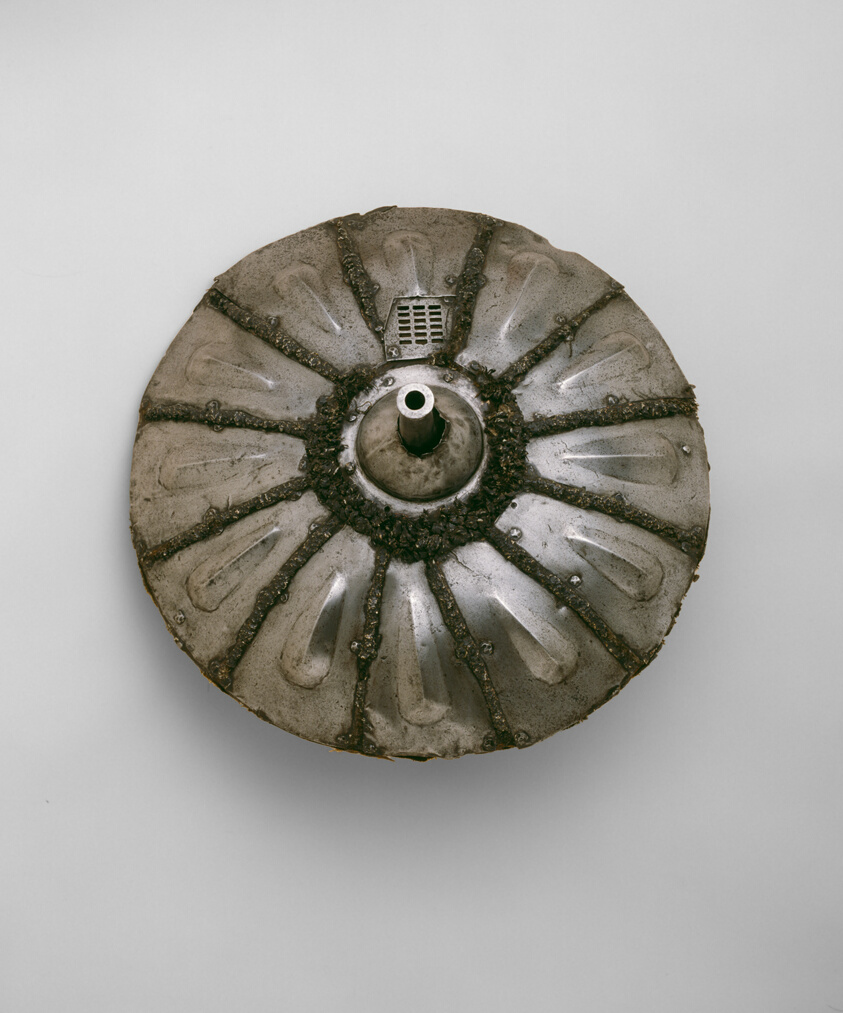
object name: Arms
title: Gun Shield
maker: Italian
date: c. 1544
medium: Steel, iron, wood, wool textile, and hemp fiber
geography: Italy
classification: combination weapon; arms; arms and armor